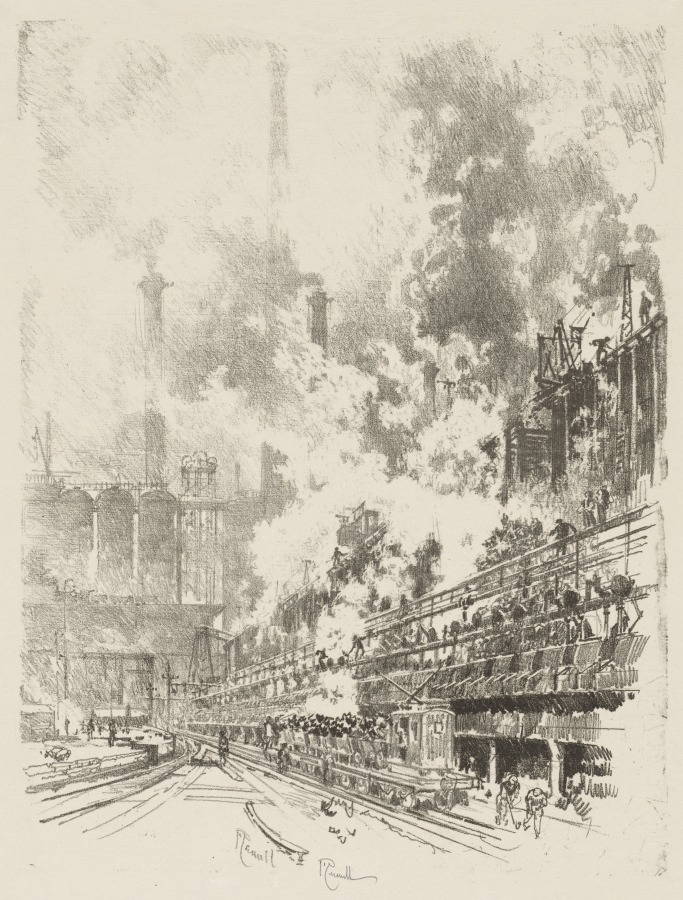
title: English War Work: By-Products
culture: America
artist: Joseph Pennell (American, 1857–1926)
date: 1916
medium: lithograph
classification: Print